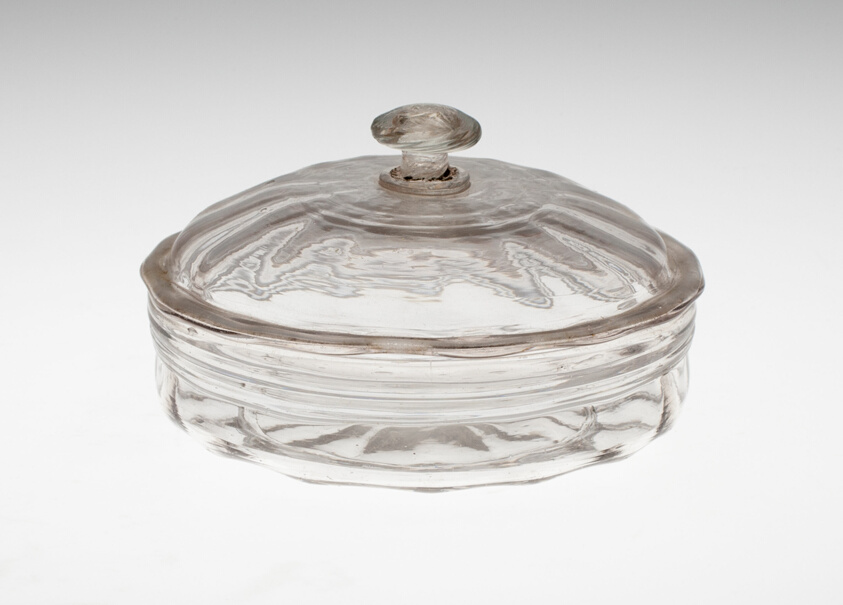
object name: Glass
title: Covered Bowl for Preserves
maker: France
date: c. 1700/25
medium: Glass; mold blown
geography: France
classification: bowl; glass; dish (vessel); european decorative arts